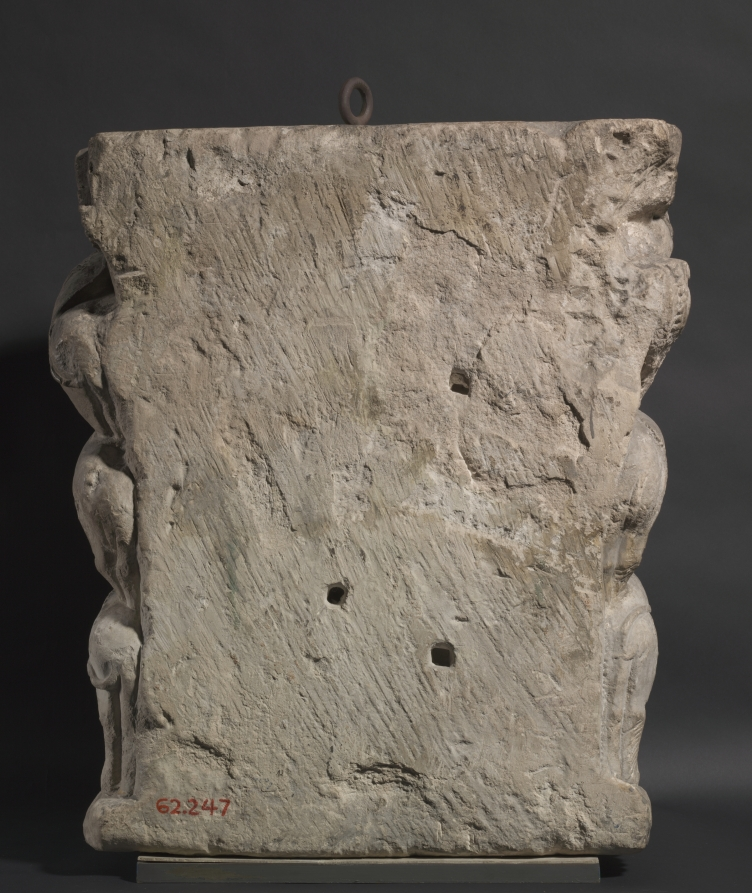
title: Daniel in the Lion's Den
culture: France, Saint-Aignan-sur-Cher, 12th century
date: c. 1125–50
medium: limestone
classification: Sculpture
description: According to the Old Testament, Daniel was cast into a lion’s den as punishment for his belief in a single god, but he was miraculously delivered from harm on account of his faith. This story is related here, with Daniel flanked by lions and the angel sent by God to save him. Together with other decorated capitals, this imposing work of Romanesque sculpture once decorated the interior of the church of Saint-Aignan-sur-Cher, a city in central France.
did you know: During the 12th century, churches used images to teach the faithful who were illiterate. While Daniel lived before Jesus, he is depicted holding a bible, alluding to the continuity between the Old and New Testaments.